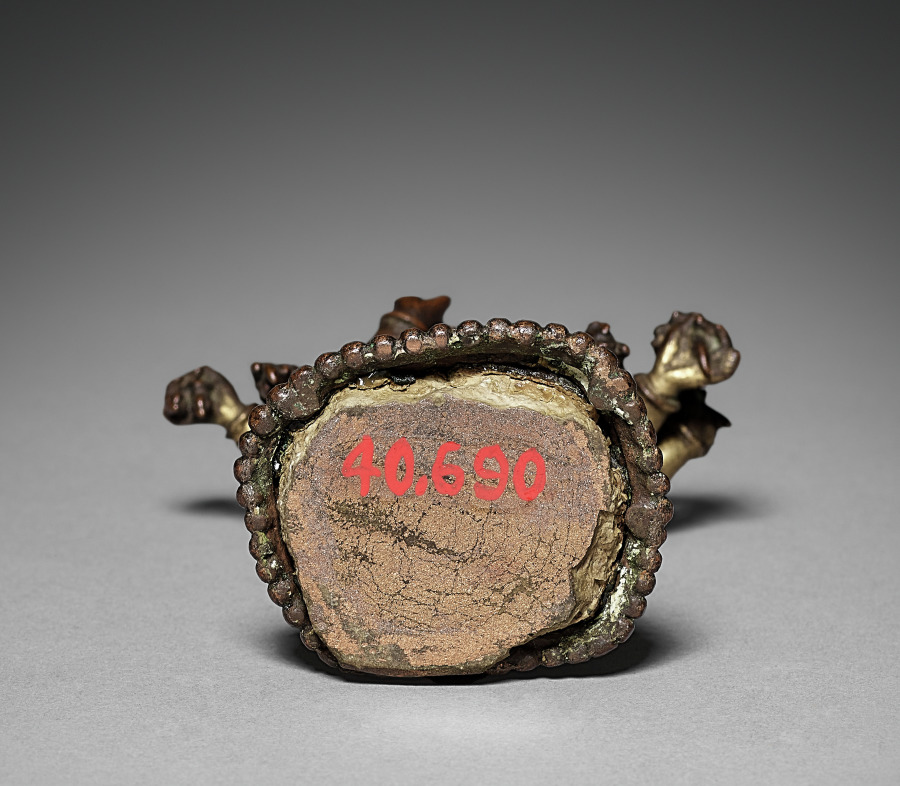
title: Lokesvara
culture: Nepal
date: 1600s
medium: gilded copper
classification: Sculpture